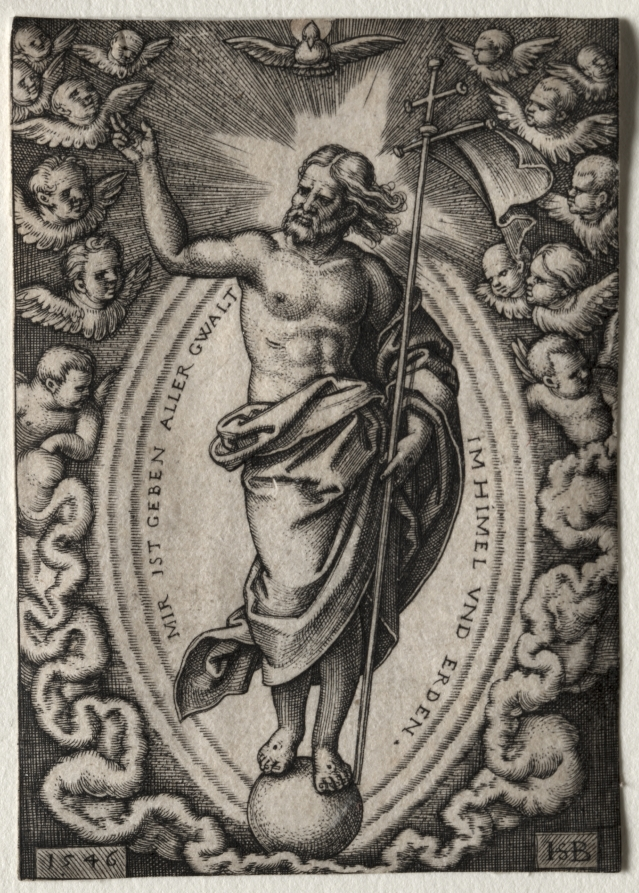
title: The Saviour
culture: Germany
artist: Hans Sebald Beham (German, 1500–1550)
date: 1546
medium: engraving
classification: Print